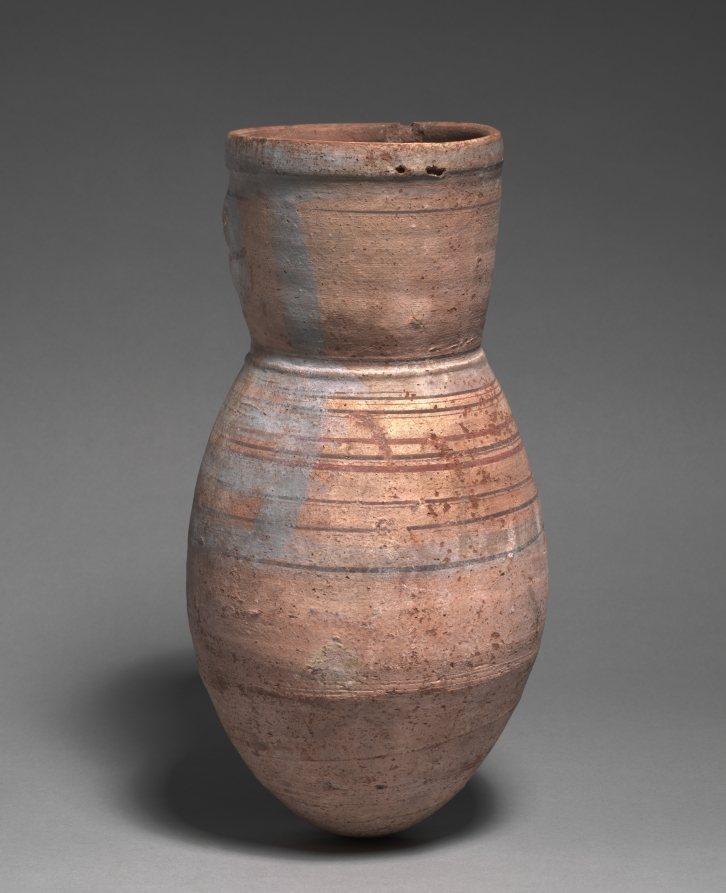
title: Hathor Jar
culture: Egypt, probably Malqata, New Kingdom (1540–1069 BCE), Dynasty 18, reign of Amenhotep III (1390–1352 BCE)–reign of Akhenaten (1351–1334 BCE)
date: 1391–1337 BCE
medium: Nile silt ware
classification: Vessels